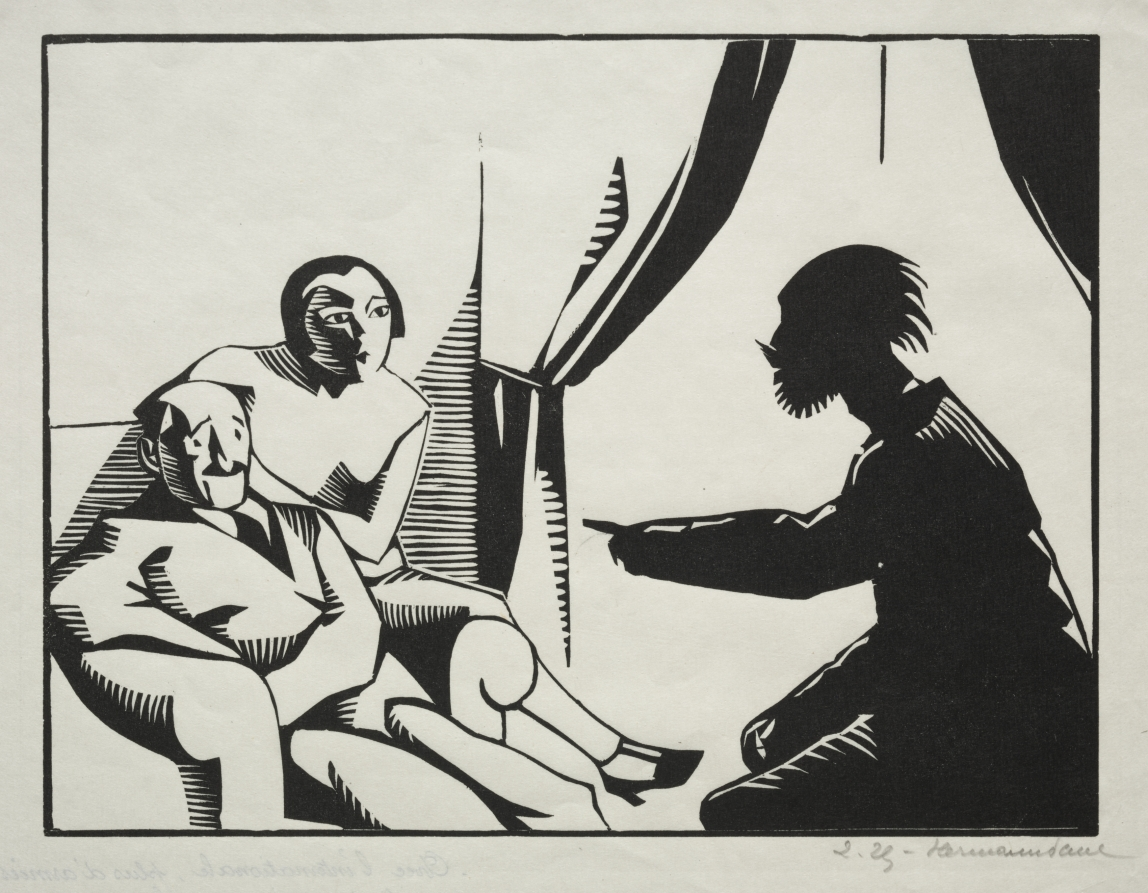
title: Avec l'internationale, plus d'armies, plus de militaires rien que les guerres civiles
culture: France, 20th century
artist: Hermann Paul (French, 1864–1940)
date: c. 1920s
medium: woodcut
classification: Print